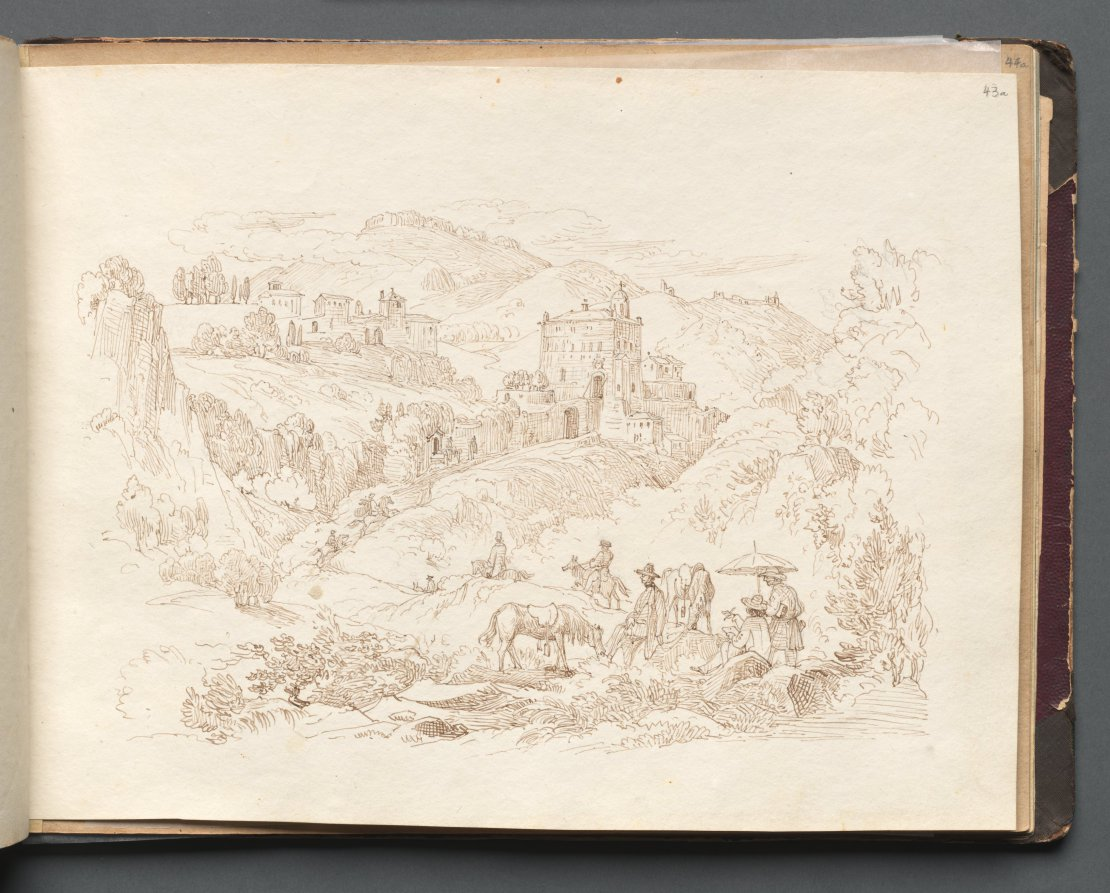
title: Album with Views of Rome and Surroundings, Landscape Studies, page 43a: Roman Landscape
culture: Germany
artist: Franz Johann Heinrich Nadorp (German, 1794–1876)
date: c. 1830s-70s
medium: pen and ink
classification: Bound Volume